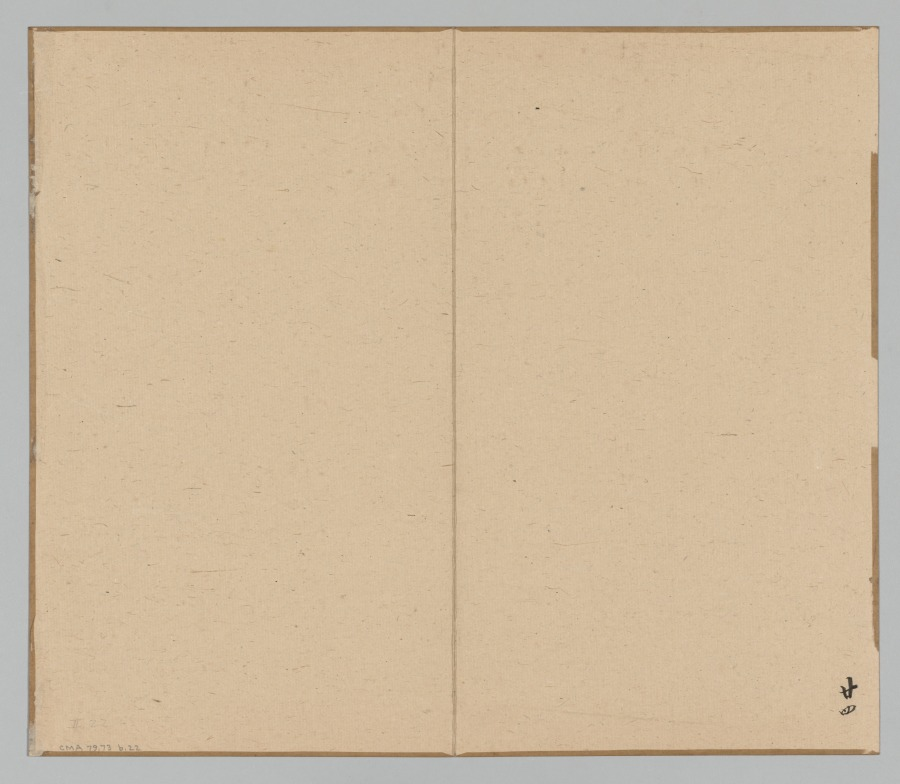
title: Reverberations of Taiga, Volume 2 (leaf 22)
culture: Japan, Edo period (1615–1868)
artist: Aoki Shukuya (Japanese, d. 1802)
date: mid- to late 1700s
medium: double-leaf from a pair of albums; ink and light color on paper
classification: Portfolio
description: Traditionally, young painters in Japan began their studies with an established master-painter. The master's compositions invariably became models that the apprentice copied to learn various ink and brush techniques. Shukuya was a pupil of the famous Kyoto artist Ikeno Taiga, whose style is reflected in these sketches of rocks, trees, and mountains.